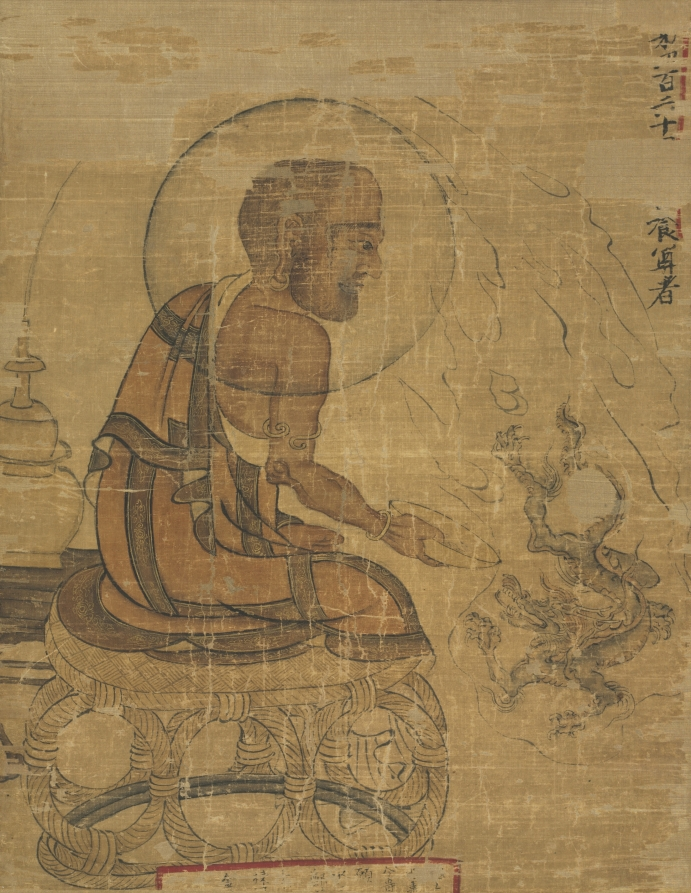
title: Arhat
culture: Korea, Goryeo dynasty (918–1392)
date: 1235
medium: Hanging scroll; ink and slight color on silk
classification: Painting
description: An arhat (Nahan in Korean), an advanced disciple of the Buddha, is represented here in profile with a halo encircling his head. This particular arhat is Segongyang jonja, numbered as the 464th of 500 arhats. He sits on a woven bamboo stool, is luring a dragon into an alms bowl. This hanging scroll is one of only about ten known works that survive today, all of which (except for Cleveland’s piece) are currently preserved in Korea or Japan.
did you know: This painting that depicts an arhat, a human being who has achieved enlightenment, used to be part of a set of 500 hanging scrolls.